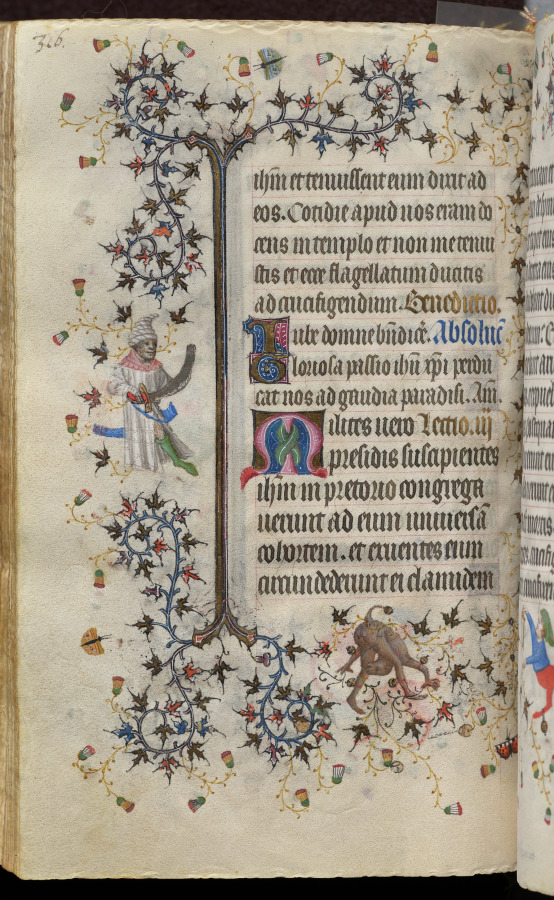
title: Hours of Charles the Noble, King of Navarre (1361-1425): fol. 158v, Text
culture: France, Paris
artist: Master of the Brussels Initials and Associates (French)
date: c. 1405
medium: ink, tempera, and gold on vellum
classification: Bound Volume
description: This precious volume was obviously highly prized by its owner, the French-born King of Navarre, who had his coat of arms painted on no less than twenty folios. Rather than directly commissioning this manuscript from a specific workshop, it seems that Charles the Noble acquired his book of hours -- perhaps ready-made for the luxury market -- while on a trip to Paris in 1404-05. A collaborative effort, six painting styles are evidenced within the pages of this codex, those of two Italians, two Frenchmen, and two Netherlanders. The painter who was responsible for the planning and decoration of the book, and who produced seventeen of the large miniatures, was a Bolognese artist known as the Master of the Brussels Initials. His principal assistant, responsible for most of the borders, was a Florentine who signed his name "Zecho" da Firenze on folio 208 verso.